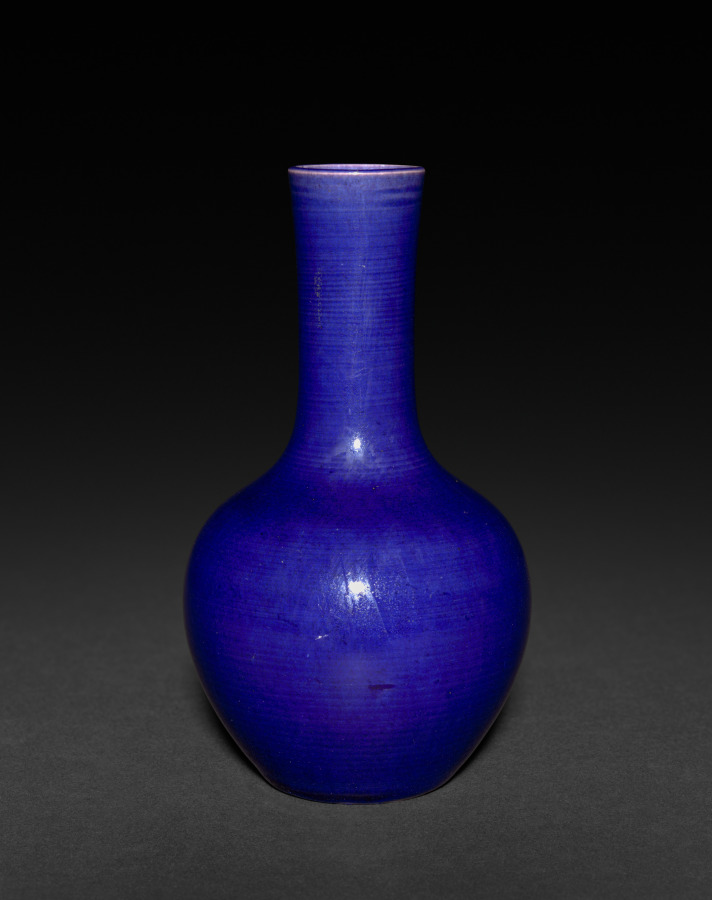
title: Bottle-Shaped Vase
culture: China, Qing dynasty (1644–1911), Qianlong reign (1736–95)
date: 1736–95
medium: porcelain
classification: Ceramic